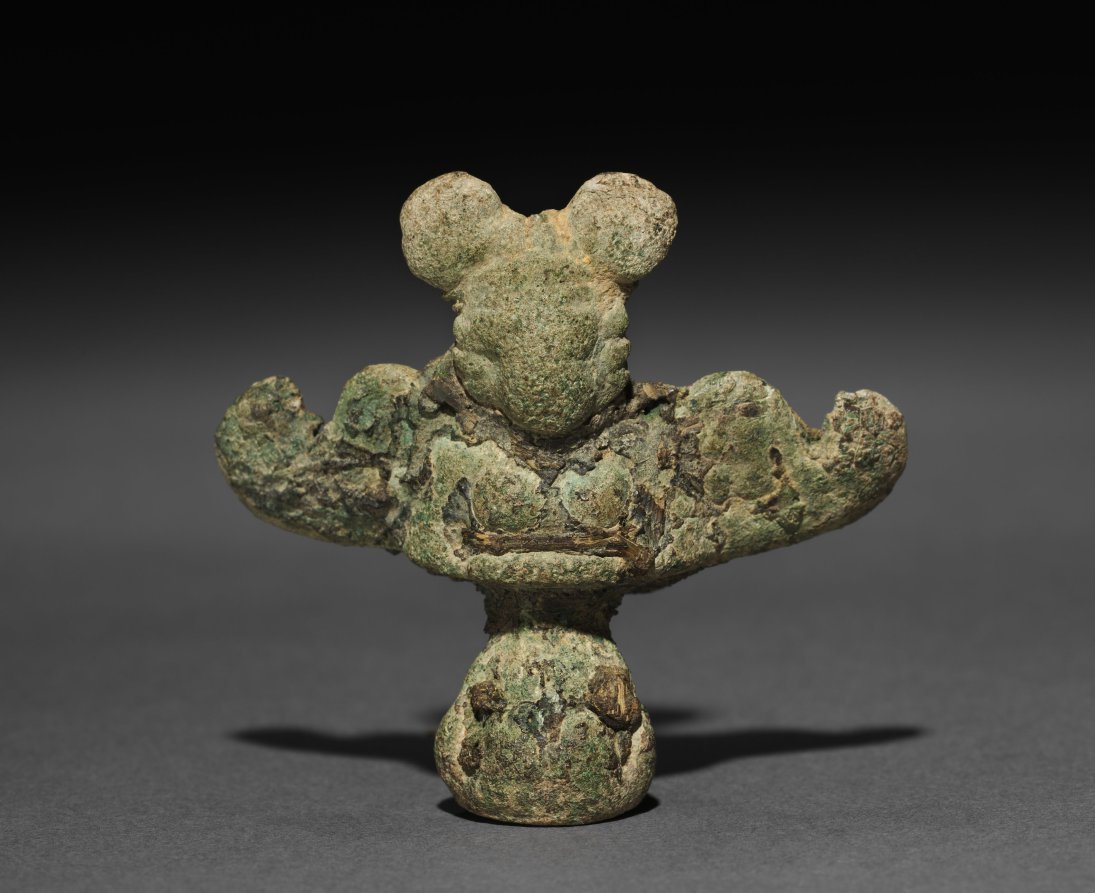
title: Ornament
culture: Parthian Empire (247 BCE–224 CE)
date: 1–200 CE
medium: bronze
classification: Metalwork